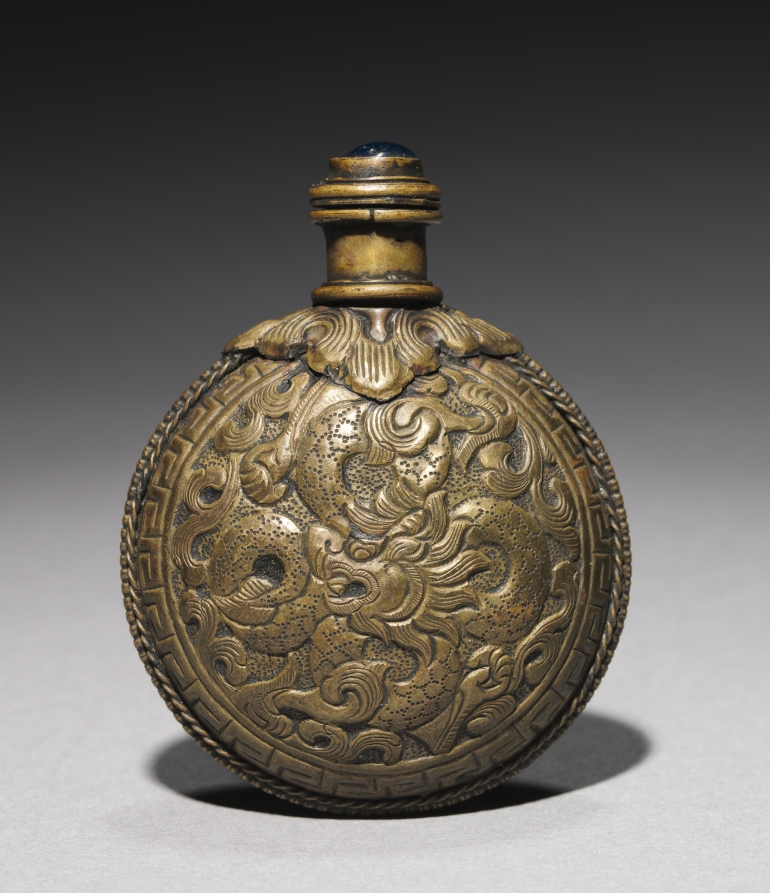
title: Snuff Bottle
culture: China, Qing dynasty (1644-1911)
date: c. 1800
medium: bronze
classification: Metalwork